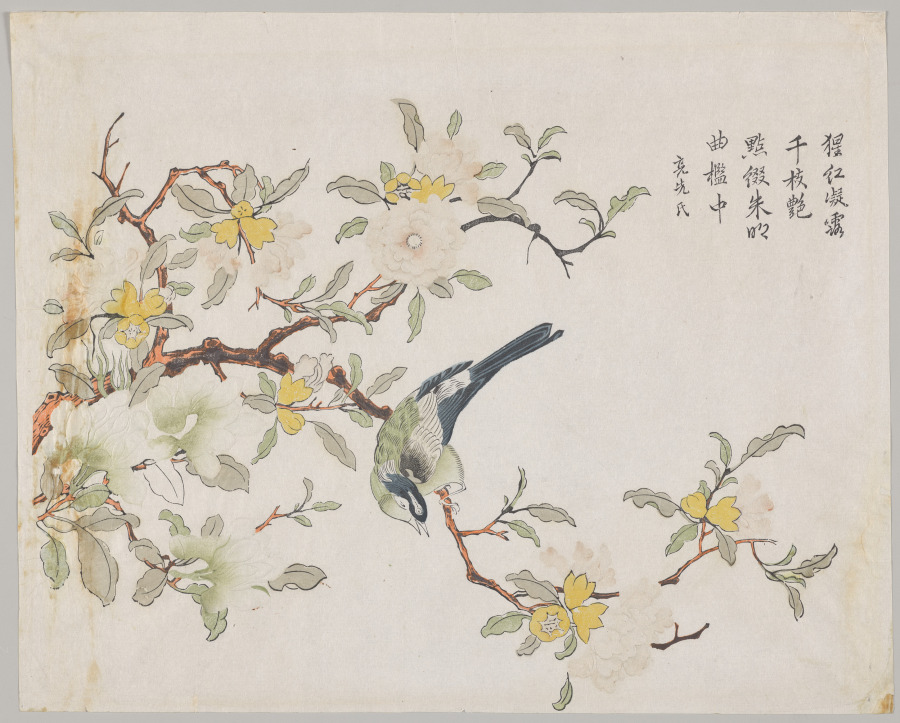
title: Bird on Pomegranate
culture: China, Suzhou, Qing dynasty (1644–1911)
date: first half of the 1700s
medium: Polychrome woodblock print; ink and color on paper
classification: Print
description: In the 1600s, printing flourished in such Jiangnan cities as Nanjing, Suzhou, Hangzhou, and Huizhou, evolving from privately enjoyed illustrated books printed in color to more commercialized single-sheet color prints that were hung on walls and became part of the rich urban visual culture.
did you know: Woodblock printing in color reached a height in China in the 1600s to 1700s. The prints were executed by means of sets of separate blocks, each carved to print a different color.